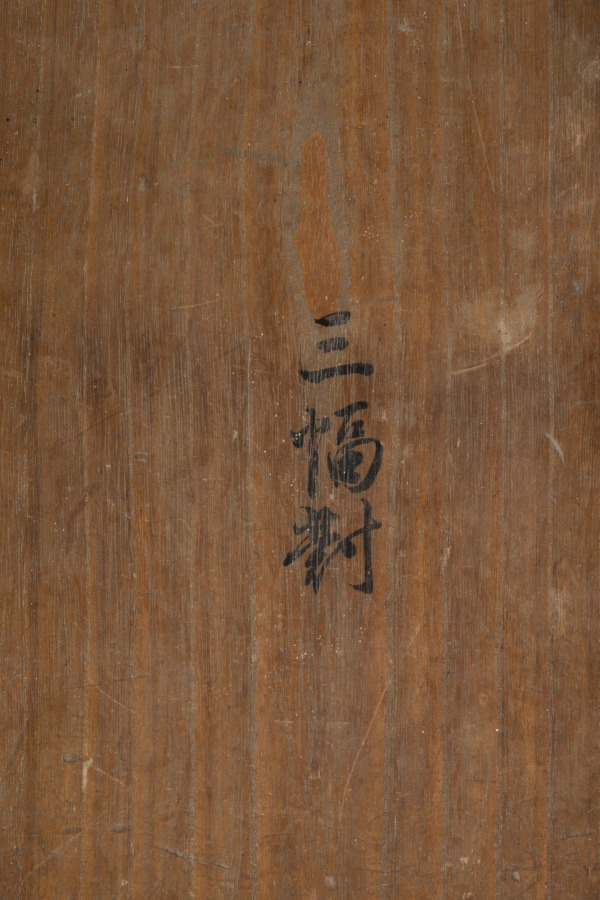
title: Minamoto no Nakakuni Visits Lady Kogō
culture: Japan, Edo period (1615–1868)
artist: Kiyohara Yukinobu (Japanese, 1643–1682)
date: late 1600s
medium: Triptych of hanging scrolls; ink and color on silk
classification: Painting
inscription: 款記「清原氏女雪信筆」/「清原女」朱文八角印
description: An aristocrat rides up a path to a residence where a woman plays a koto, a stringed instrument. The central composition is flanked on the right by a day-lit spring scene, and on the left by a nocturnal autumnal scene. The triptych presents an episode from The Tale of the Heike in which Minamoto no Nakakuni is sent by the emperor to look for Lady Kogō.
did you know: The Tale of the Heike chronicles the conflict between the Taira (Heike) and Minamoto (Genji) families in the late 12th century.